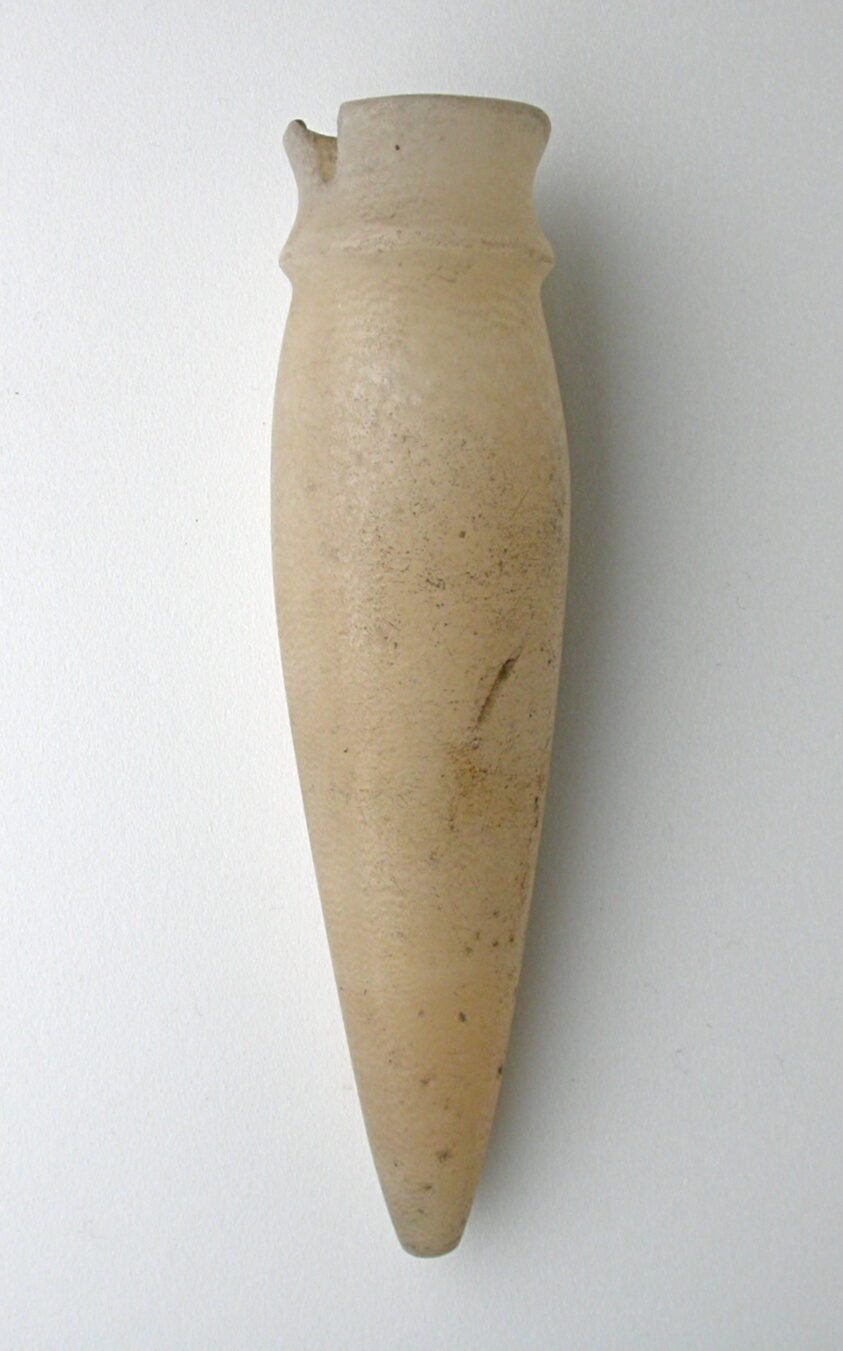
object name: Vessel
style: old kingdom, first intermediate period, egyptian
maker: Egyptian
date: Old Kingdom, Dynasty 5–6 (about 2494–2181 BCE)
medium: Travertine (Egyptian alabaster)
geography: Egypt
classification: vessel; stone; ancient art